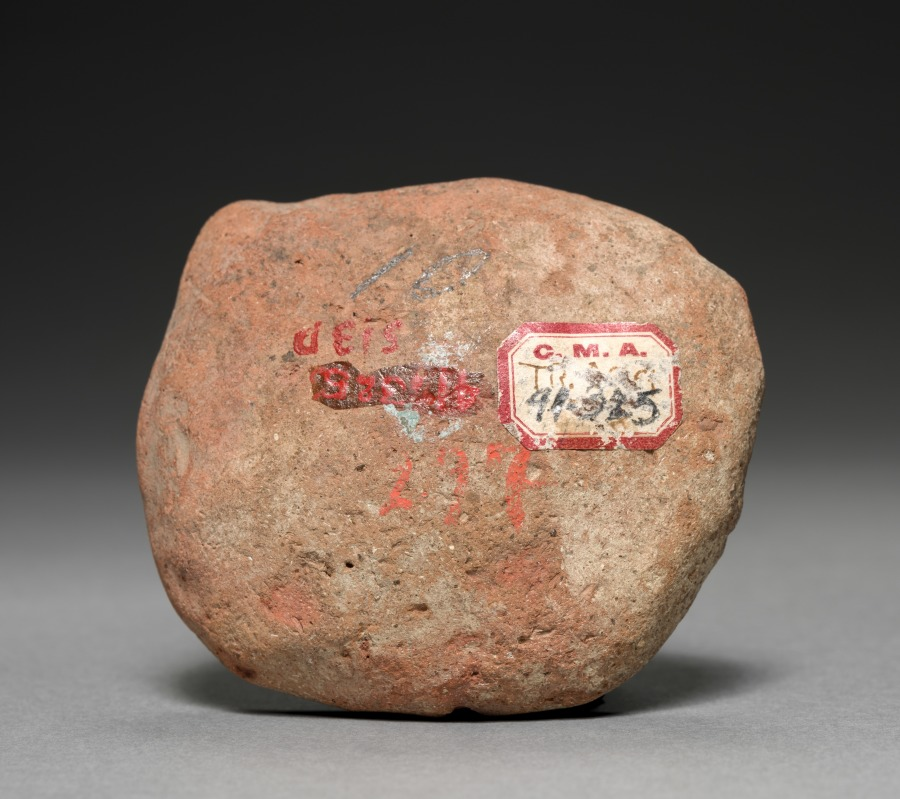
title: Faience Mold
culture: Egypt, Late period (715–332 BCE)(?)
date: 545–332 BCE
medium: terracotta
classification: Ceramic